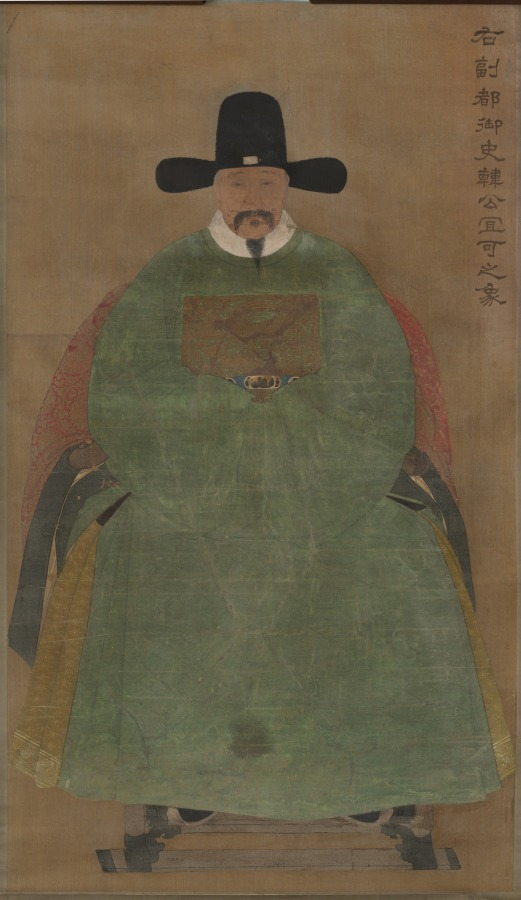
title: Han Yige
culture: China, Ming dynasty (1368–1644)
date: c. 1368–1644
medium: hanging scroll; color on silk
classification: Painting